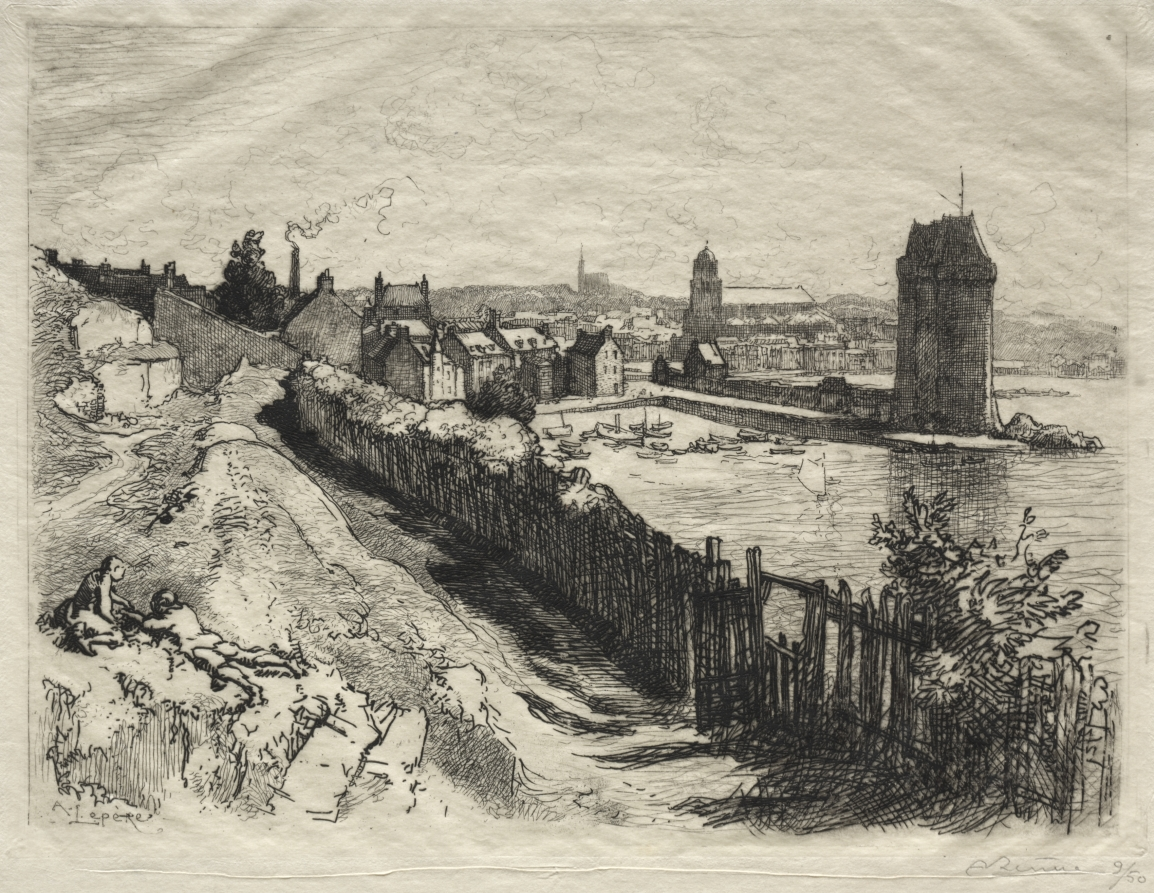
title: Saint-Servan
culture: France, 19th-20th century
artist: Auguste Louis Lepère (French, 1849–1918)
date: 1912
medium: etching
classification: Print